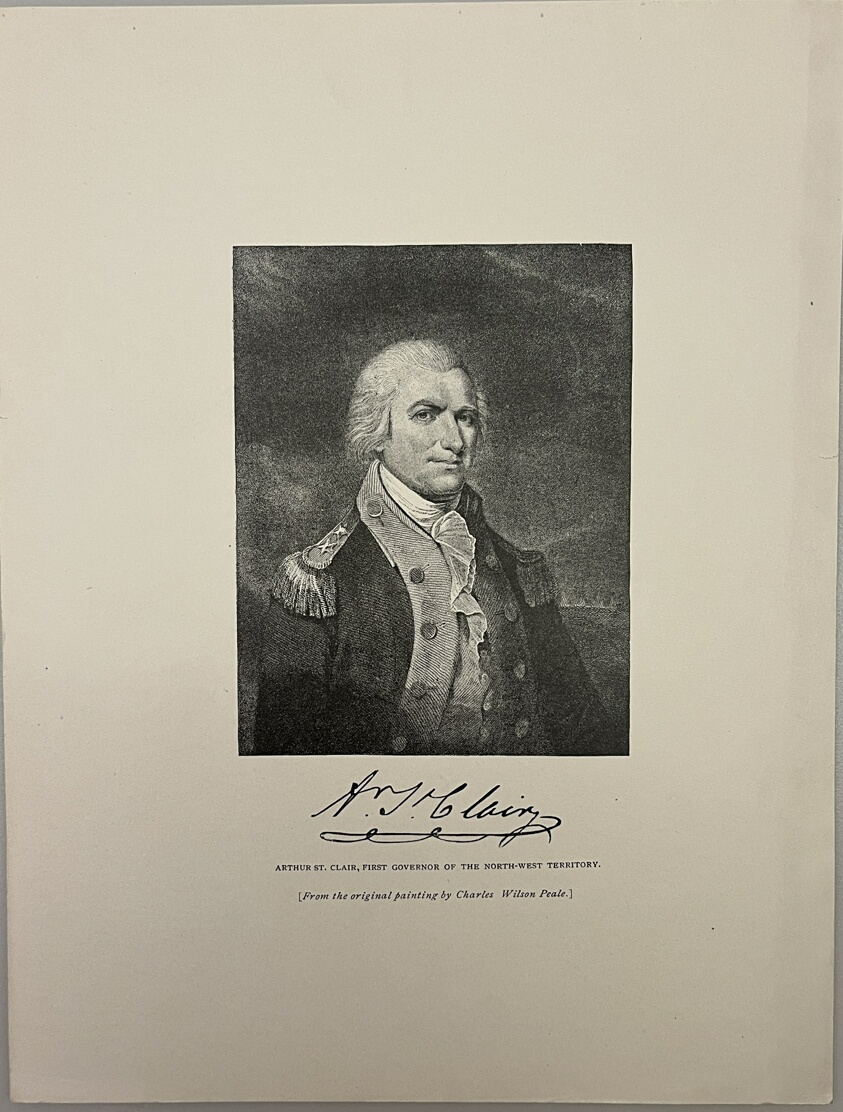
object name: Print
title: Major General Arthur St. Clair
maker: Edward Wellmore (American, active mid-19th century); after James Barton Longacre (American, 1794-1869); after Charles Wilson Peale (American, 1741-1827)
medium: Photolithograph on paper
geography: United States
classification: reproduction; print; prints and drawing